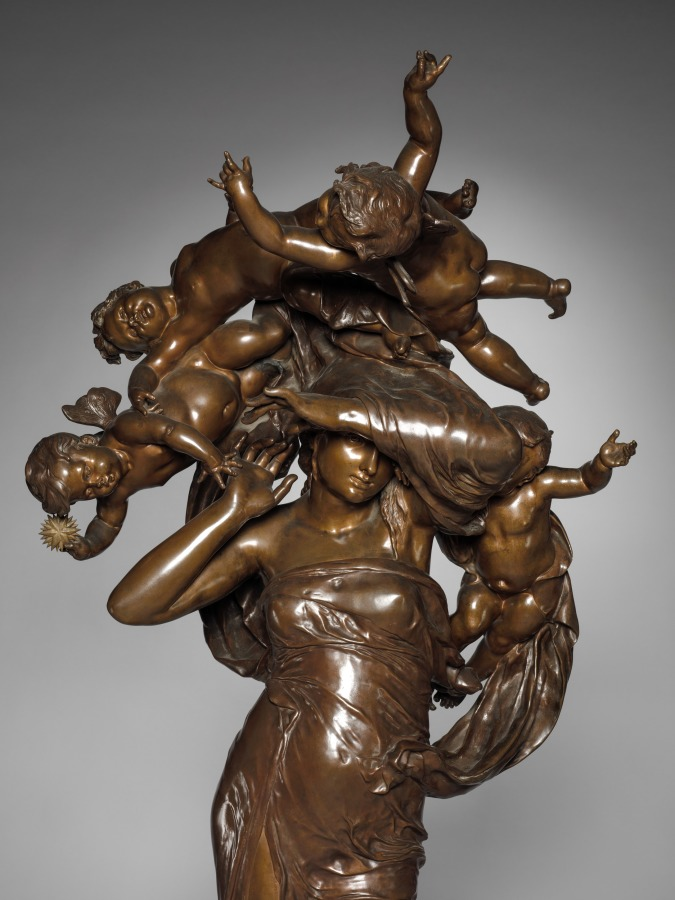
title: Dawn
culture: France, 19th century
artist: Gustave-Joseph Chéret (French, 1838–1894)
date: c. 1883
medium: bronze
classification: Sculpture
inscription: signed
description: This sculpture is of the same design as one exhibited by Chéret at the Paris Salon of 1883.